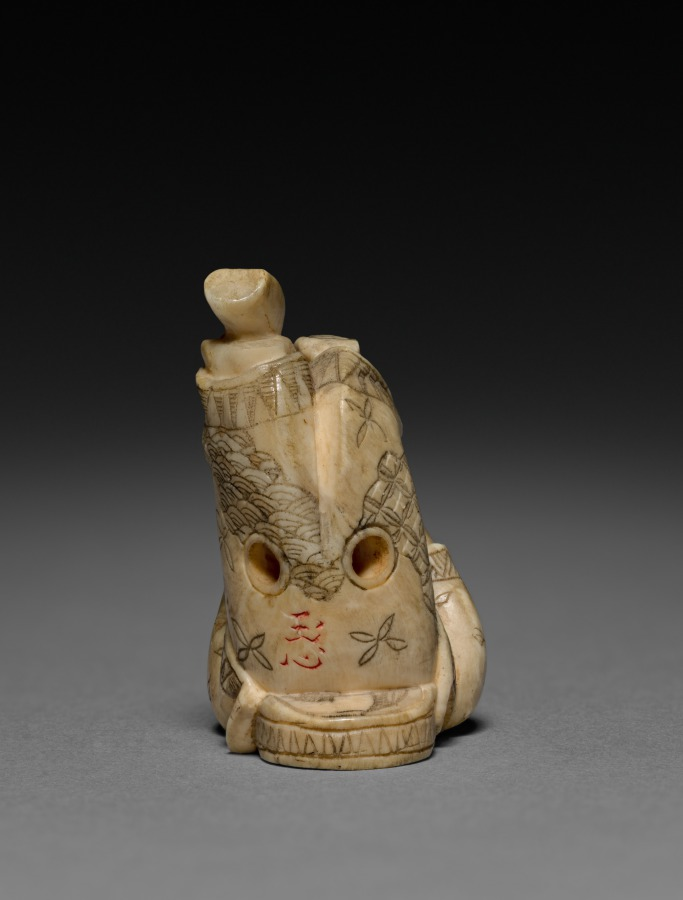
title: Netsuke of Child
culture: Japan, Meiji period (1868–1912)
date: early 1900s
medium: ivory, pigment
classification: Ivory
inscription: 玉心